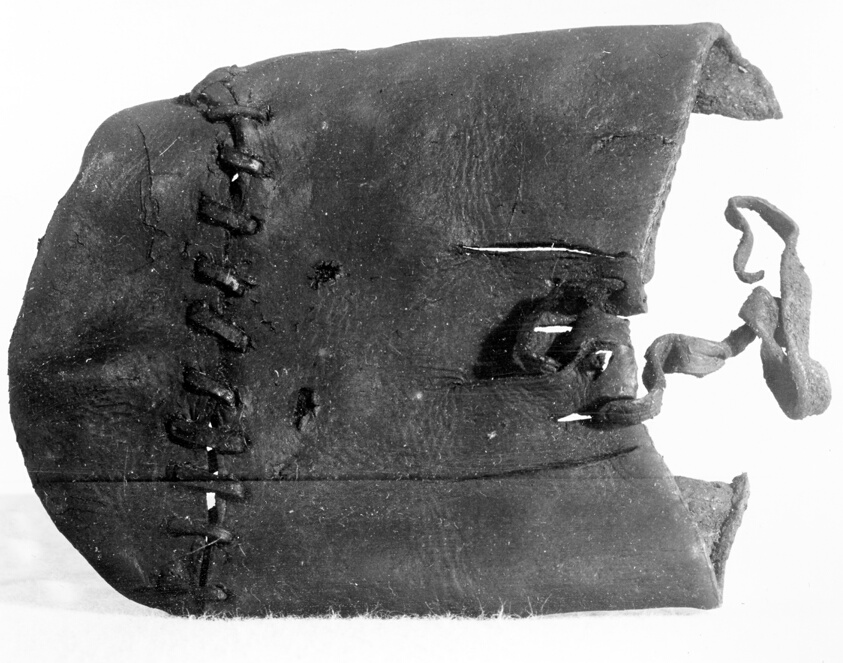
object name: Textile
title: Toe of a Shoe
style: elizabethan, tudor, european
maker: England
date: 16th century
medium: Leather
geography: England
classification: textile; costume accessory - shoe; shoes - misc; costume; dress (garment); clothing